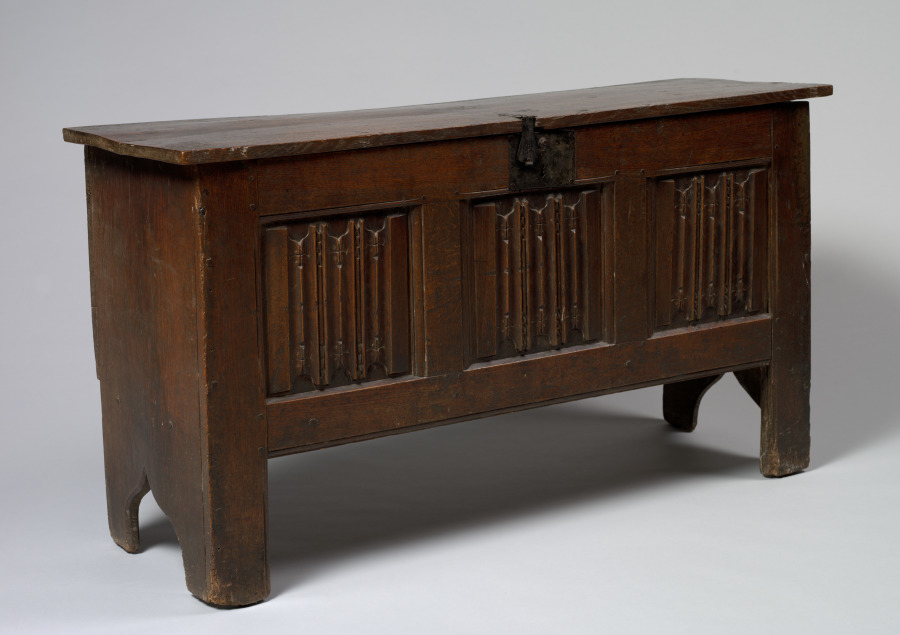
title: Chest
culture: England, late 15th - early 16th centuries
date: c. 1490–1520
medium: oak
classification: Furniture and woodwork